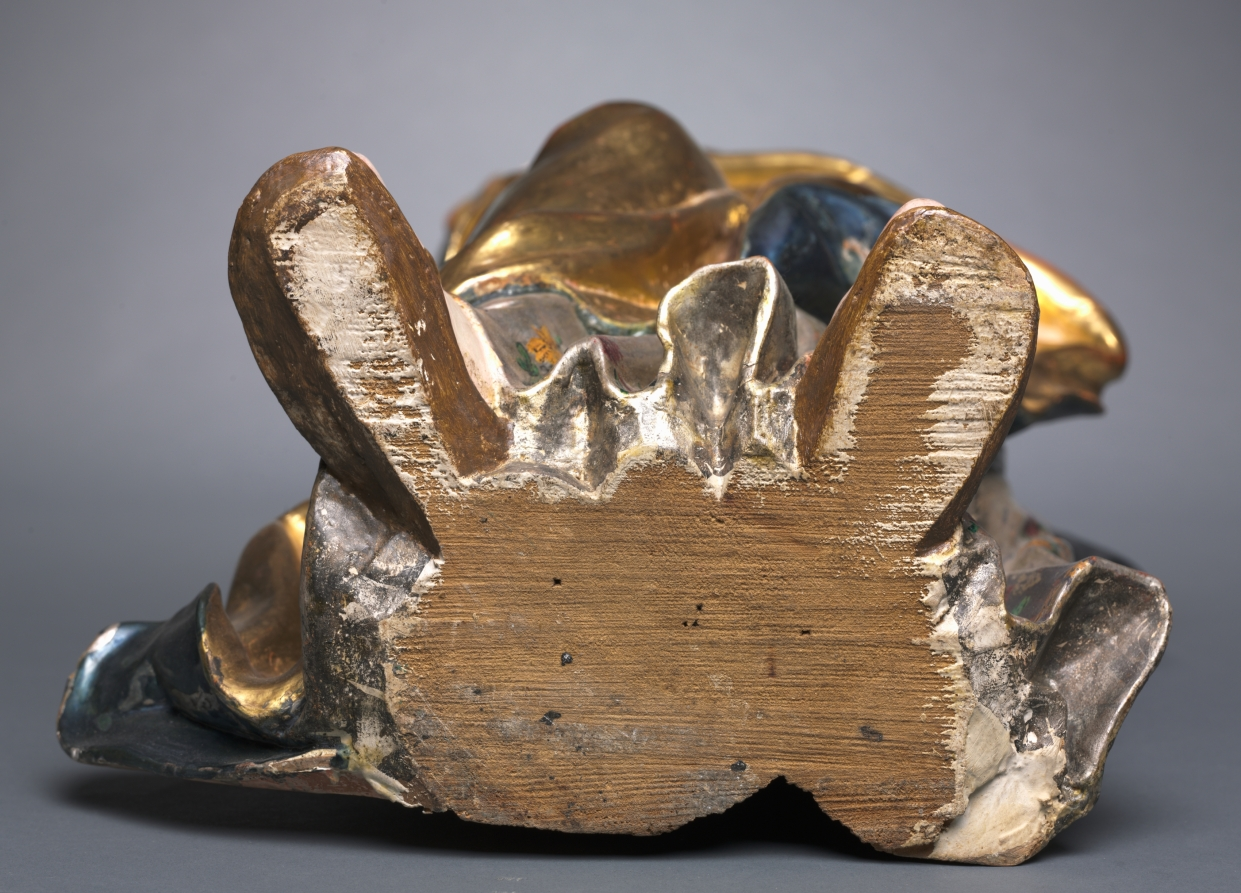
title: Virgin Mary as a Child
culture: Austria, Vienna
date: 1750–75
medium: painted and gilded wood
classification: Sculpture